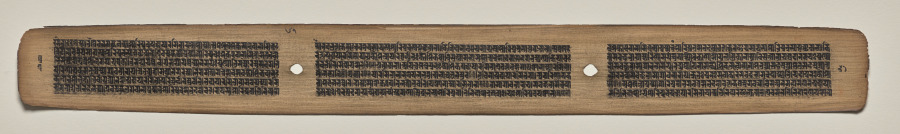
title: Text, Folio 61 (verso), from a Manuscript of the Perfection of Wisdom in Eight Thousand Lines (Ashtasahasrika Prajnaparamita-sutra)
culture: Eastern India, Bihar, Vikramashila Monastery. Painting: Nepal, Kathmandu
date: Sunday, September 14, 1119 (year 239 of the Newar Samvat in the month of Ashvina)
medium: gum tempera and ink on palm leaves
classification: Painting